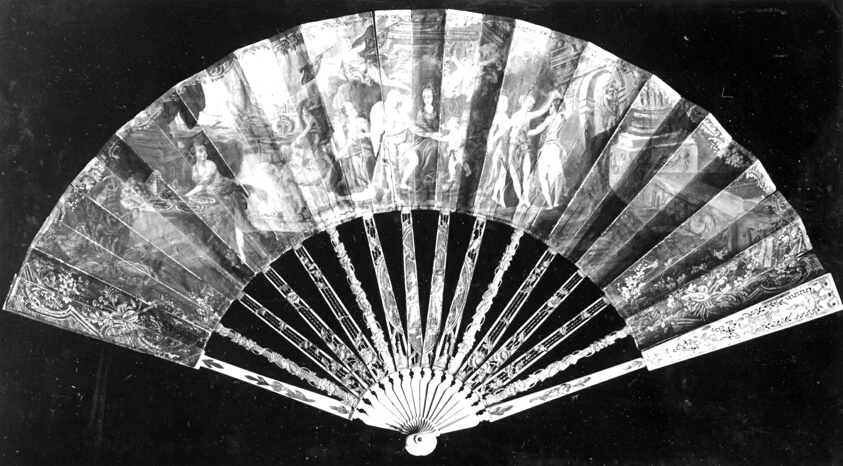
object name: Costume and Accessories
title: Fan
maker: France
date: 18th century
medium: Ivory sticks with pierced and gilded decoration; painted paper mount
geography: France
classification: textile; fan - paper; costume accessory - folding fan; costume